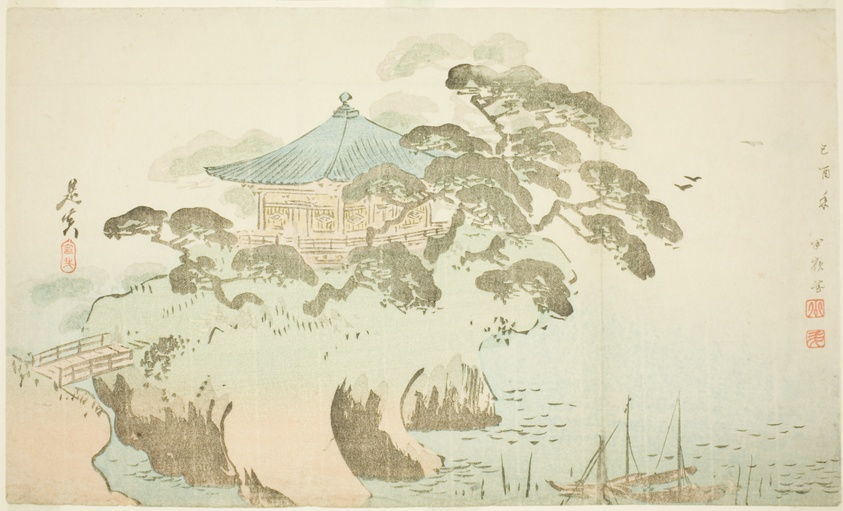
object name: Print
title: A temple hall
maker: Shibata Zeshin (Japanese, 1807-1891)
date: 1885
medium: Color woodblock print; surimono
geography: Japan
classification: print; asian art